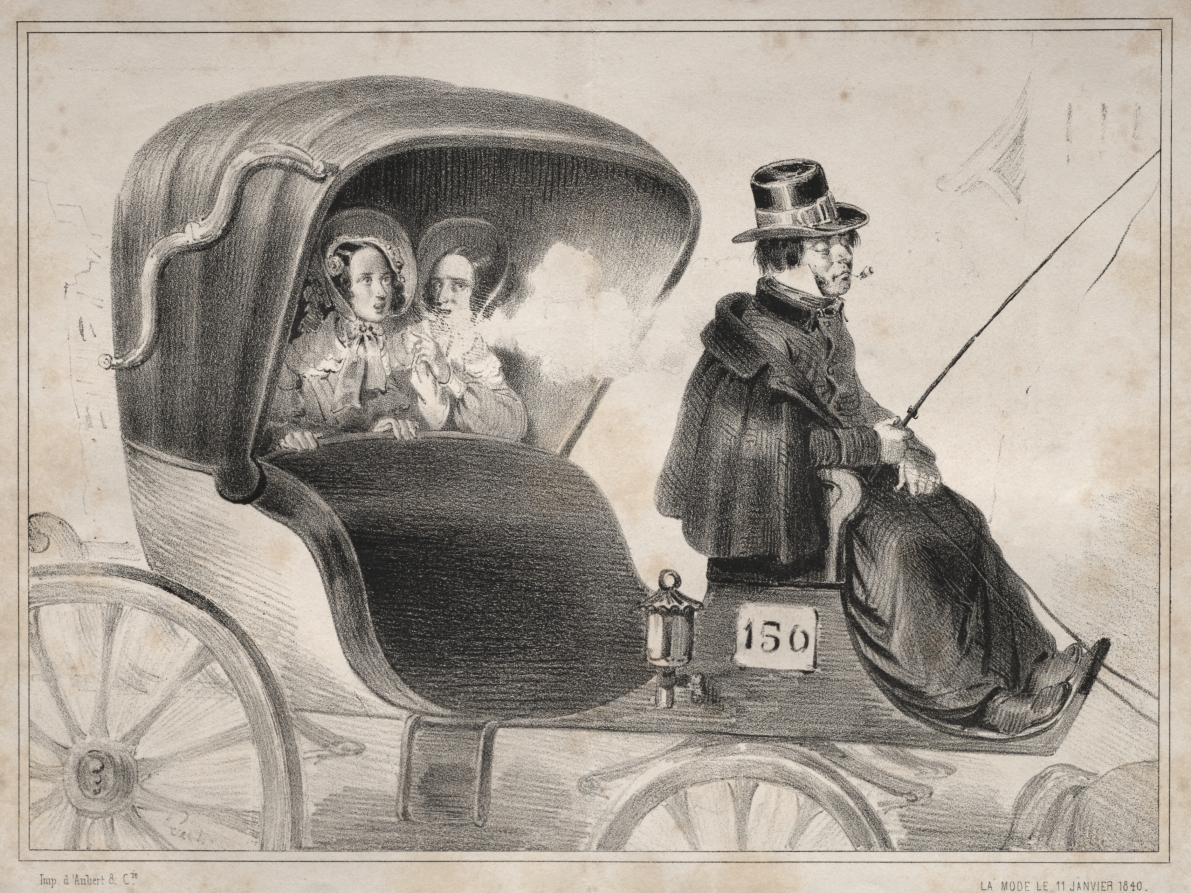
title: Actualités: Les Inconvénients des voitures publique: Le cocher de...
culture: France, 19th century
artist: Clémente Pruche (French, 1831–1870)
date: 1839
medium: lithograph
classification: Print